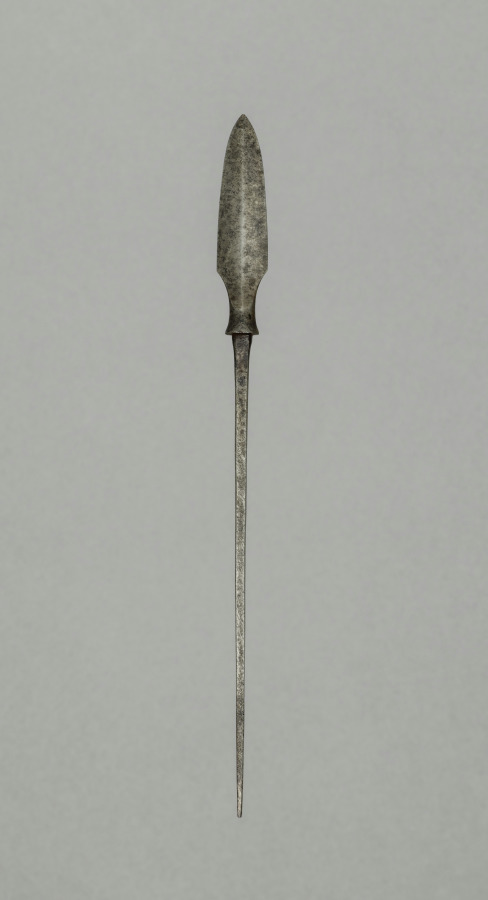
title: Arrow Point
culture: Japan, Edo period (1615–1868)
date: 1700s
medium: steel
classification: Arms and Armor